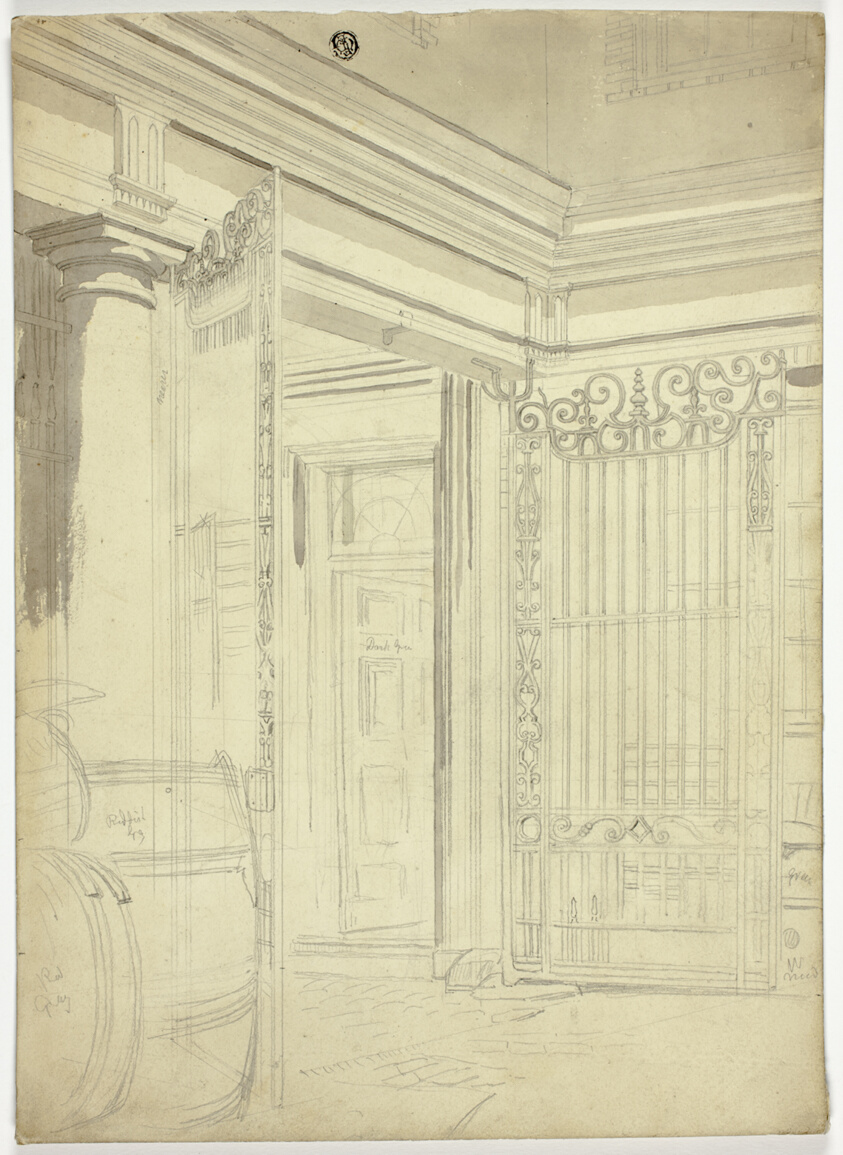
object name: Drawing and Watercolor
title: Entryway with Open Gate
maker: Unknown Artist; American or British, n.d.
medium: Graphite, with brush and brown wash, on cream card, laid down on ivory card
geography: United States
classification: graphite; drawings (visual works); prints and drawing